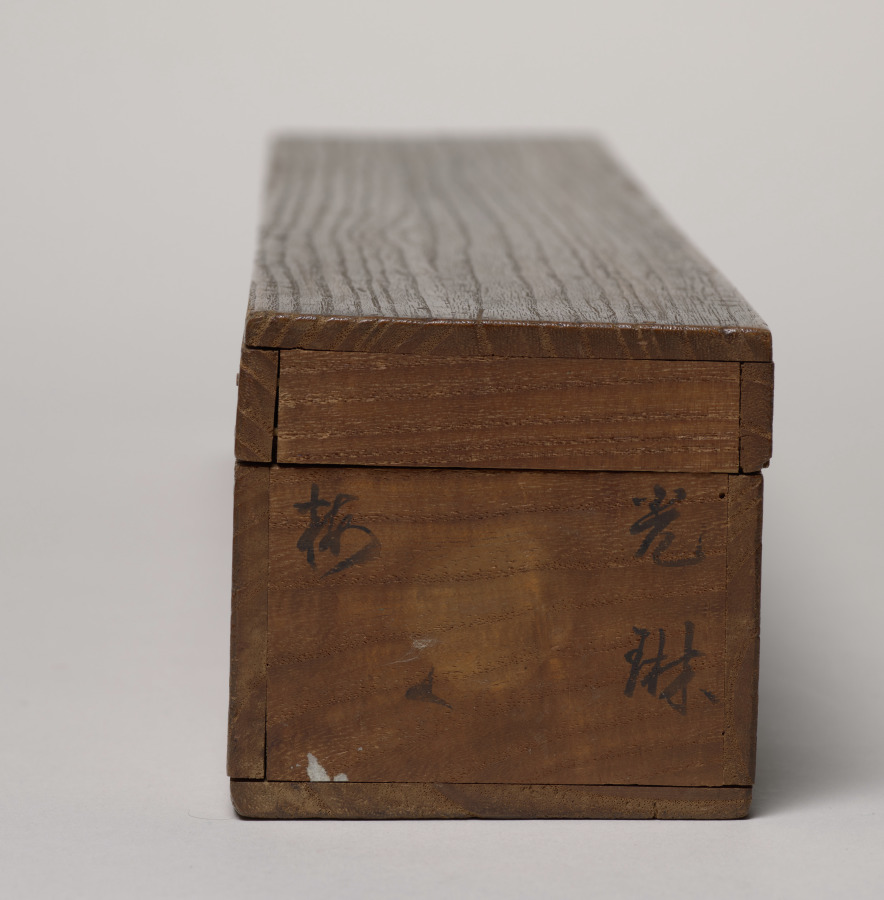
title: Plum Tree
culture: Japan, Edo period (1615–1868)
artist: Ogata Kōrin (Japanese, 1658–1716)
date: c. 1700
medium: hanging scroll; ink on silk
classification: Painting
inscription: Artist's signature and seal above hillock bottom right corner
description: Ogata Kōrin had to think through his design carefully to create these white plum blossoms and deliver their effect, as he used the reserve technique—where selected areas of the painting surface are left unpainted—to achieve it. He probably roughed in the tree before applying an ink wash to the entire silk surface, except where he intended to place the flowers. He likely then returned to articulate the petals and, in some cases, the pistils and stamens. The composition shows the tree twisting out of view, only to return with a branch of new growth jabbing forth from an old, broken limb, thereby heightening the visual impact of the blossoms.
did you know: The Rinpa style of painting is named for Ogata Kōrin, even though he did not create it.